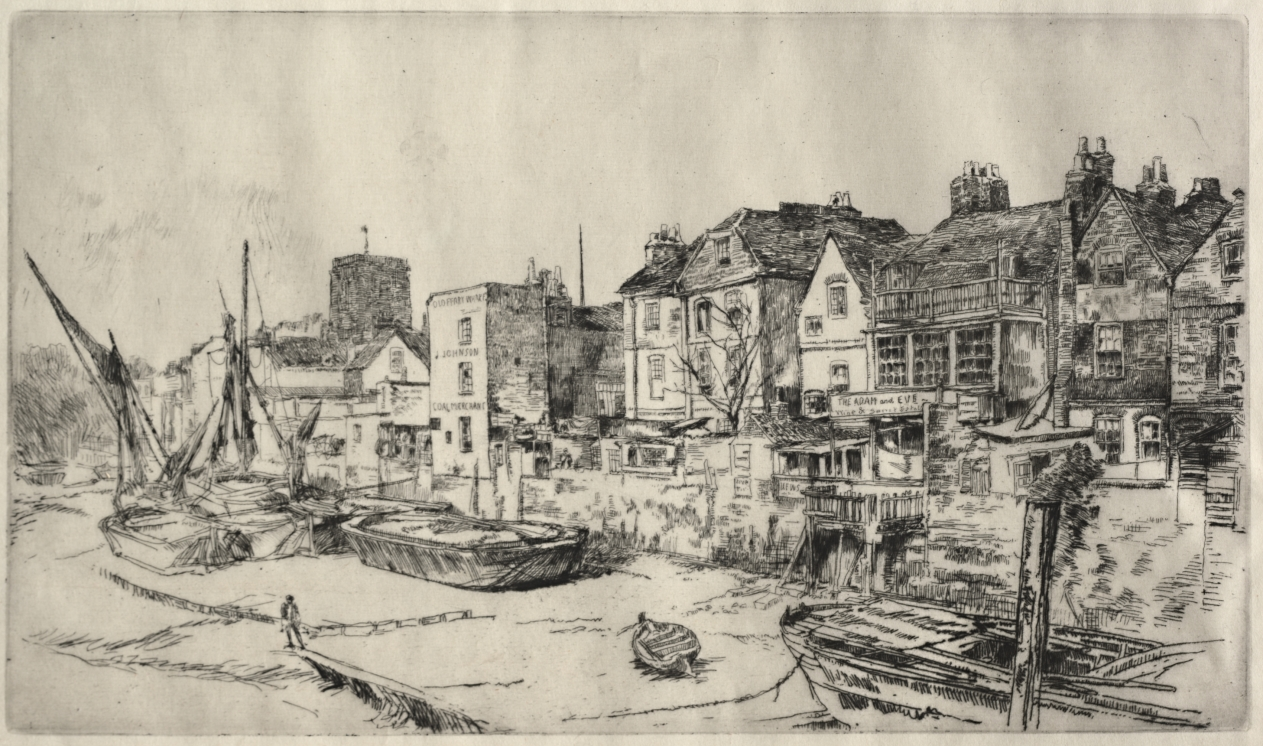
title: "Adam and Eve" Tavern, Old Chelsea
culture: America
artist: James McNeill Whistler (American, 1834–1903)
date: 1878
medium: etching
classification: Print